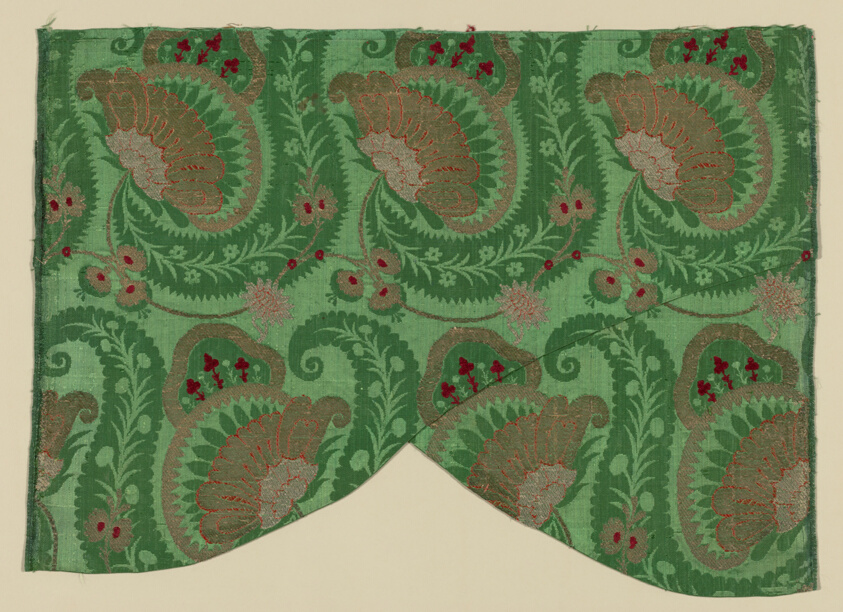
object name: Textile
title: Fragment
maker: Italy, probably Venice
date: 1701/25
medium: Simple satin damask, brocaded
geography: Italy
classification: textile; weaving